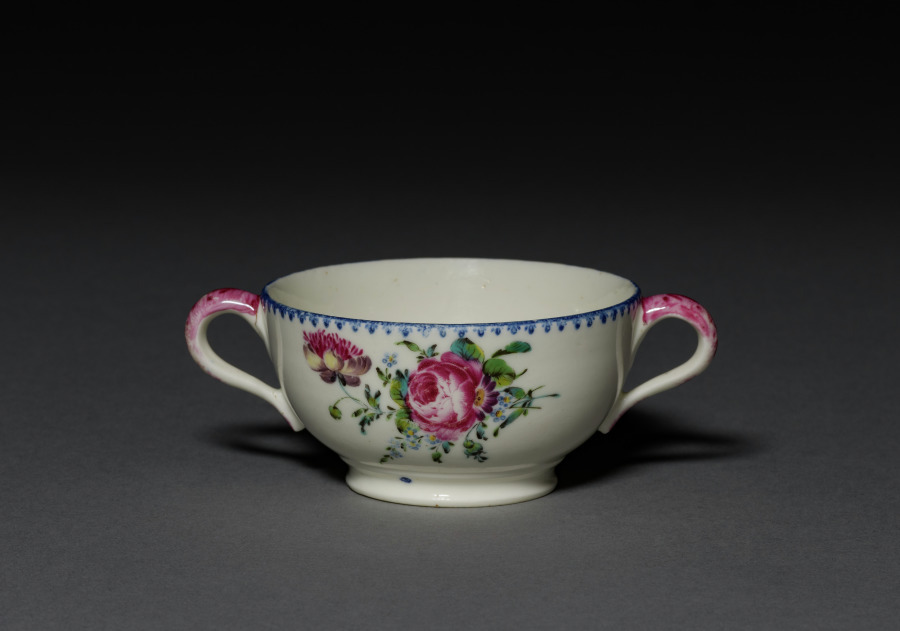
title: Broth Bowl (Écuelle ronde)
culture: France, Mennecy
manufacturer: Mennecy- Villeroy Factory (French)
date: c. 1755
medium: soft-paste porcelain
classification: Ceramic